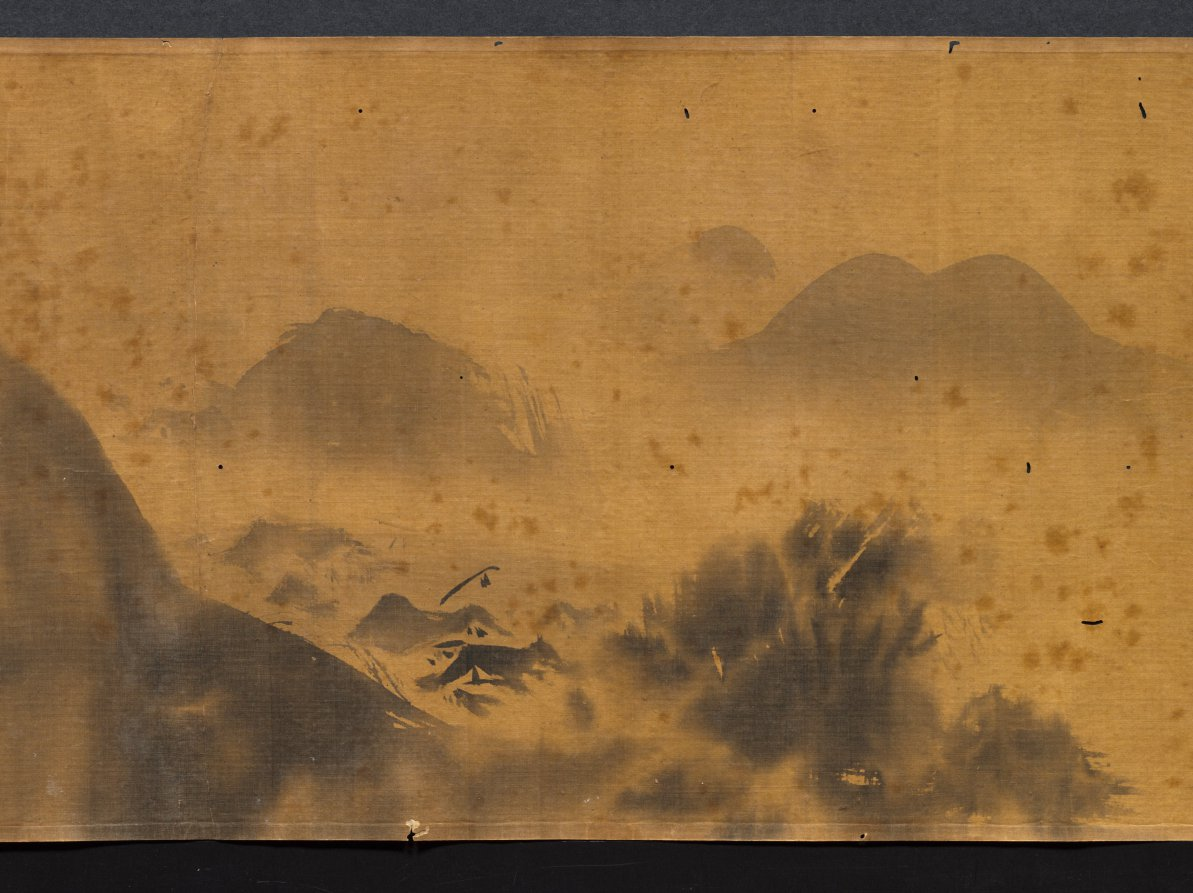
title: Eight Views of Xiao-Xiang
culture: Japan, Edo period (1615–1868)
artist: Kano Tan’yū (Japanese, 1602–1674)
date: 1615–1868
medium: handscroll; ink on silk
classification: Painting